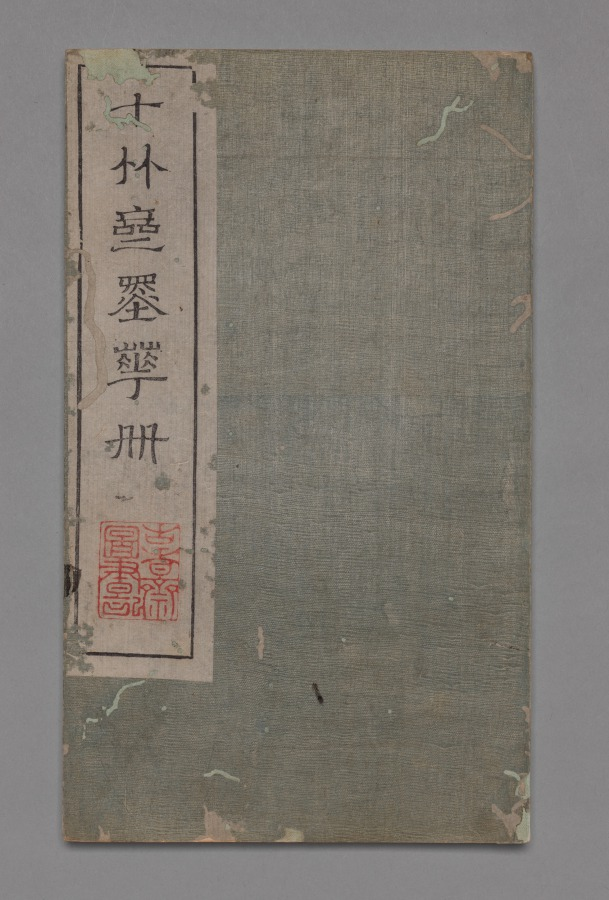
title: Ten Bamboo Studio Painting and Calligraphy Handbook (Shizhuzhai shuhua pu): Miscellaneous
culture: China, Qing dynasty (1644-1911)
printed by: Hu Zhengyan (Chinese, c. 1584–1674)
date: 1633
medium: Woodblock-printed book; ink and colors on paper; first edition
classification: Print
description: Color printing reached a level of perfection in the early 1600s, as seen in this Ten Bamboo Studio Collection of Calligraphy and Painting and the Mustard Seed Garden Manual of Painting (printed 1679 and 1701). The painterly quality, precision in registering (aligning) the woodblocks, and harmonious colors made them the most successful color print editions in Chinese history. Both editions were printed and compiled in Nanjing, spread nationwide, and had a great impact on the arts in Japan and Korea.